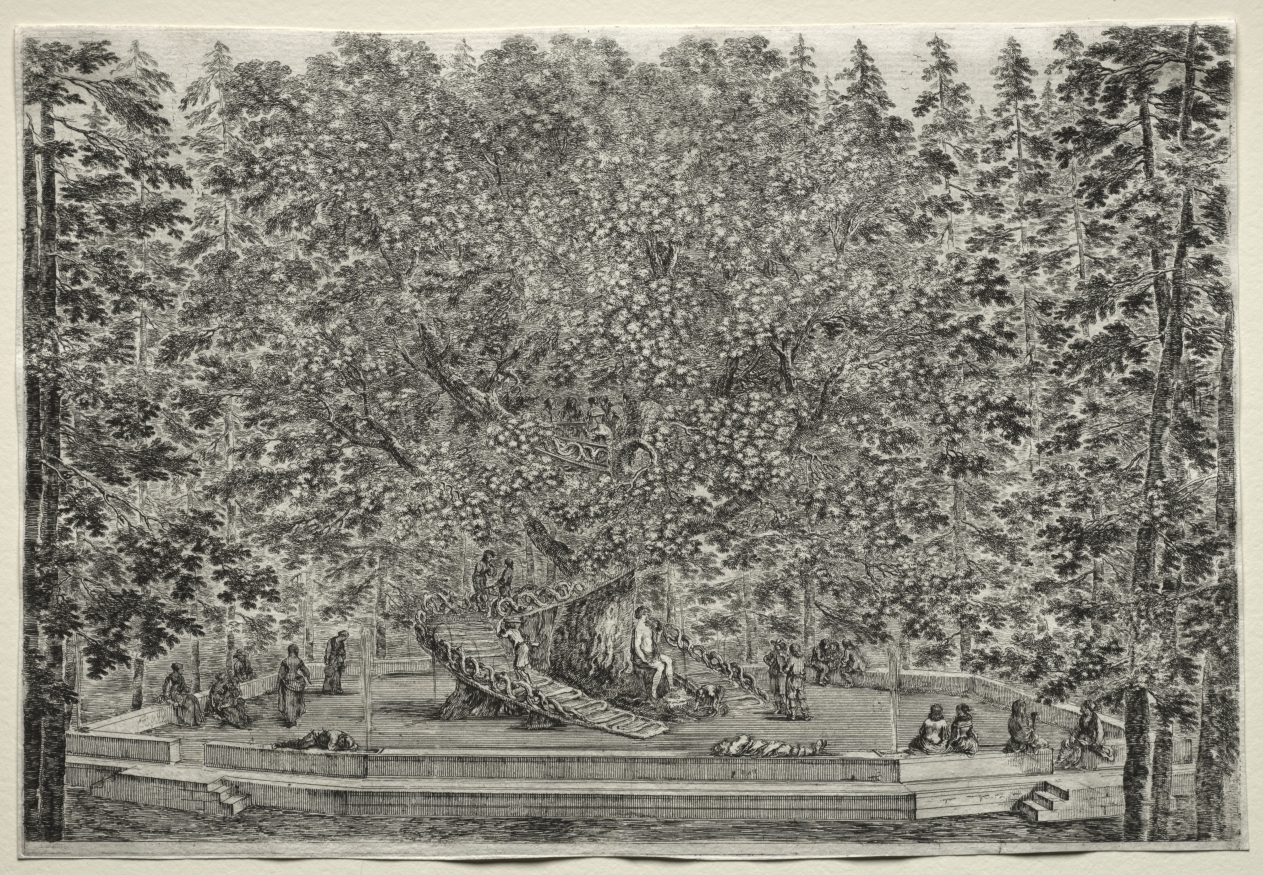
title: Views of the Villa of Pratolino: The Inhabited Tree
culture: Italy, 17th century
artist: Stefano Della Bella (Italian, 1610–1664)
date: c. 1653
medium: etching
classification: Print